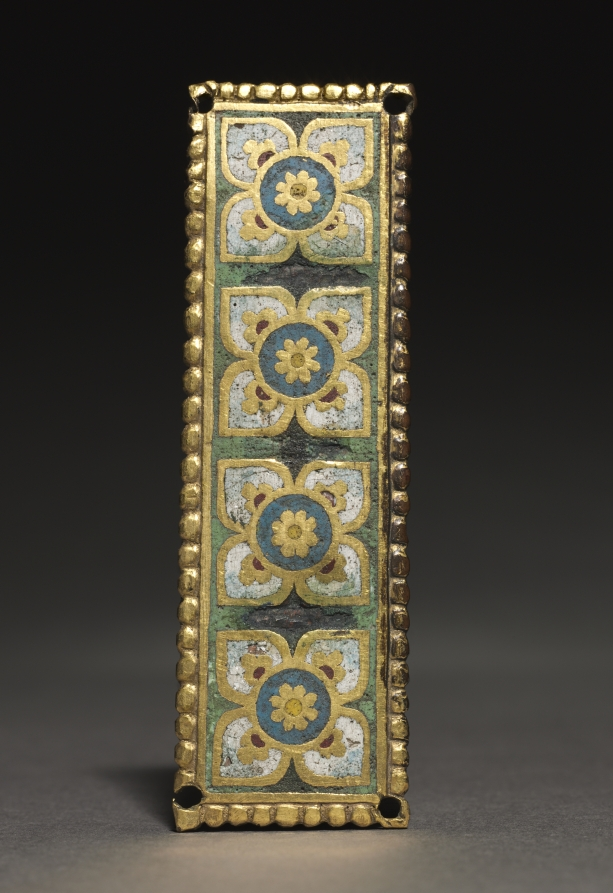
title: Plaque, probably from a Reliquary Shrine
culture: Mosan, Valley of the Meuse, Gothic period, mid-13th century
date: c. 1200–1250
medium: gilded copper; champlevé enamel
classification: Enamel